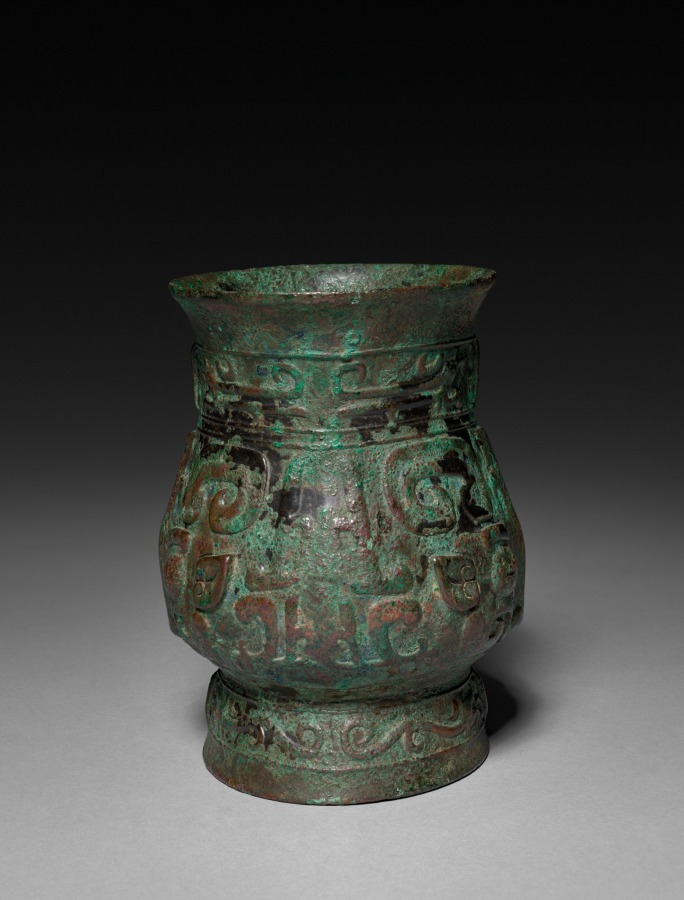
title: Zun: Ceremonial Vessel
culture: China, Zhou dynasty (c. 1046–256 BCE)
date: c. 1023–900 BCE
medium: bronze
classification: Metalwork